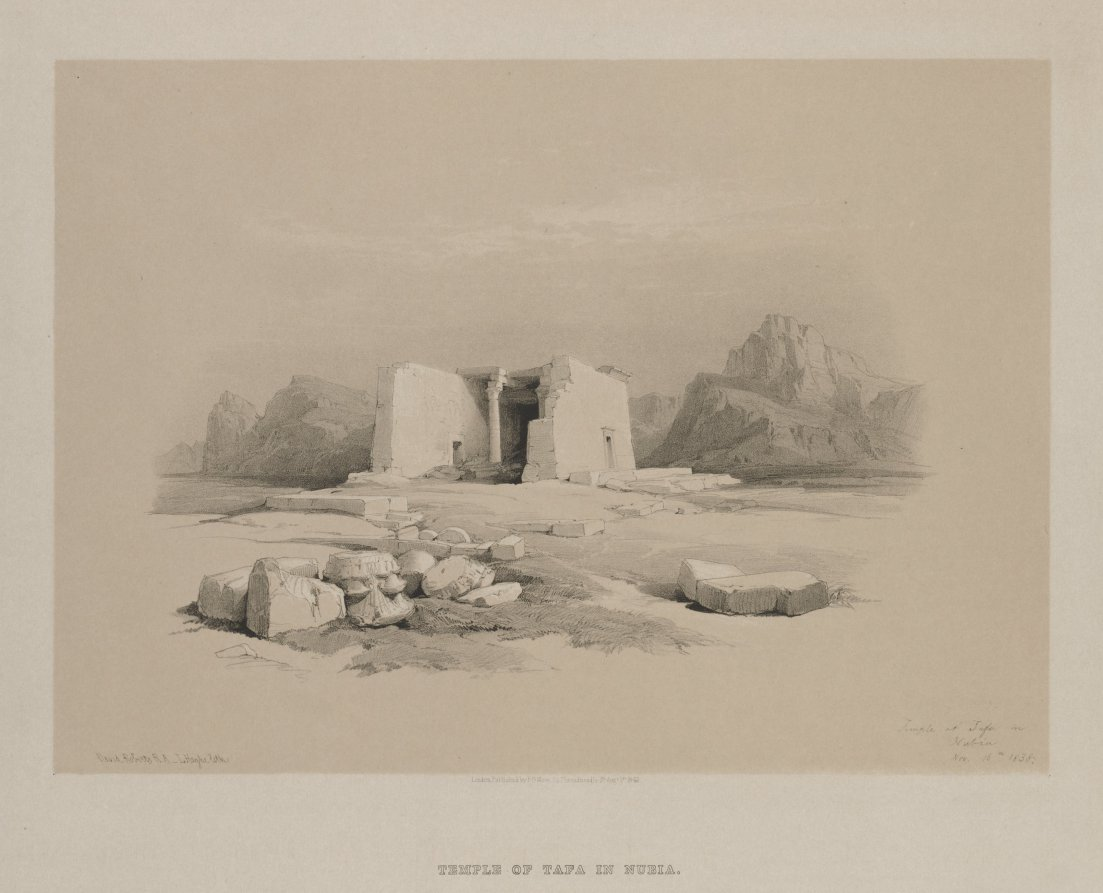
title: Egypt and Nubia, Volume I: Temple at Tafa in Nubia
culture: England, 19th century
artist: Louis Haghe (British, 1806–1885)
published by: F. G. Moon, 20 Threadneedle Street, London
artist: after David Roberts (Scottish, 1796–1864)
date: 1846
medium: color lithograph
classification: Print